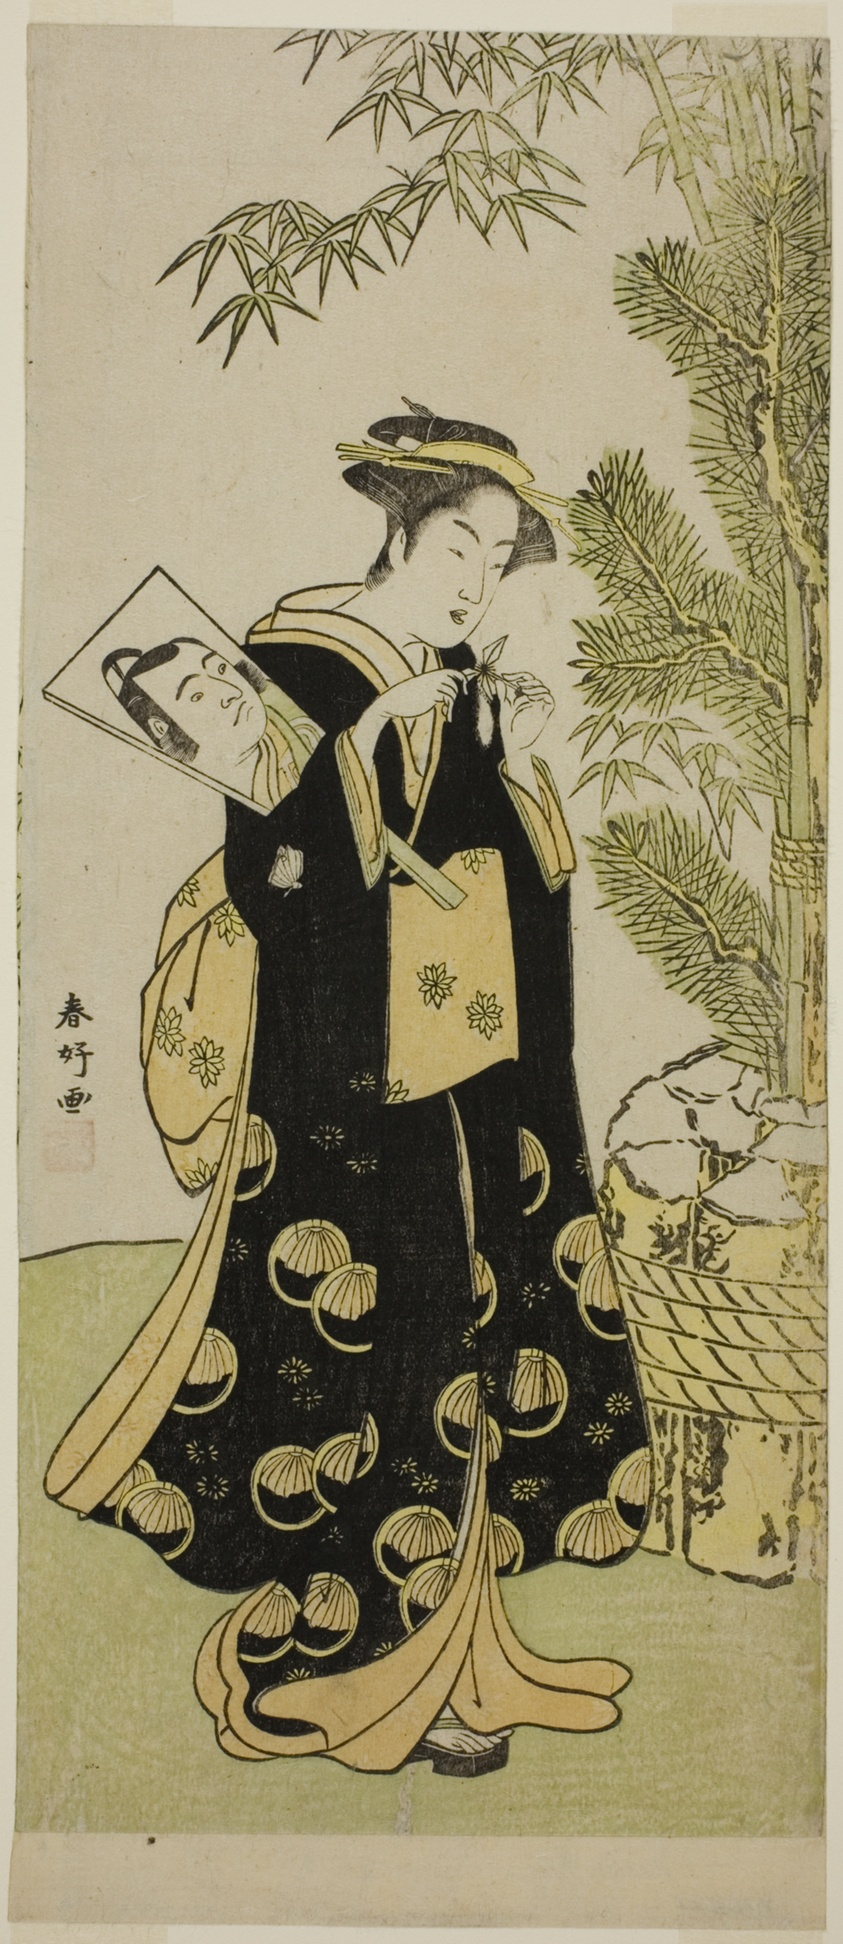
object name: Print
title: The Actor Segawa Kikunojo III as Otora in the Play Ume-goyomi Akebono Soga, Performed at the Ichimura Theater in the Third Month, 1780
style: Japanese (culture or style)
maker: Katsukawa Shunko I; Japanese, 1743-1812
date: c. 1780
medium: Color woodblock print; hosoban; left sheet of diptych (?)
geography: Japan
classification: woodblock print; print; asian art